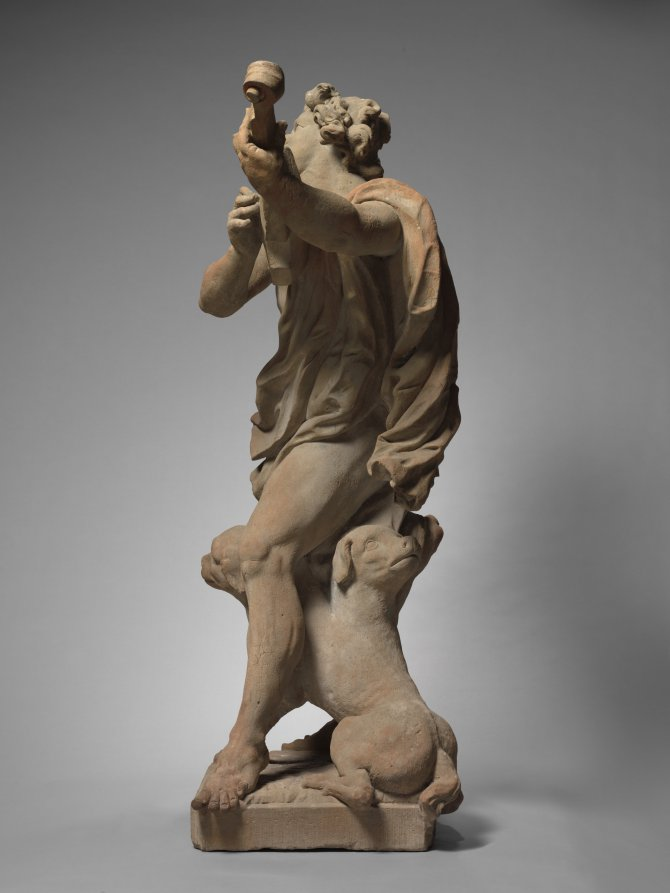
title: Orpheus and Cerberus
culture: Germany, near Bamberg, 18th century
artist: Ferdinand Tietz (Austrian, 1708–1777)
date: c. 1765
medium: sandstone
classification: Sculpture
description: This work was one of numerous sculptures Tietz created for the gardens of Schloss Seehof, near Bamberg in Bavaria (Germany), the summer residence of the Prince Bishops of Bamberg. The exaggerated forms of Orpheus's face and musculature caricature the idealized proportions of classical sculpture. A further parody exists with his companion: the usually terrifying hound Cerberus is here nothing more than a docile puppy, sitting calmly at Orpheus's feet. Meant to be viewed outdoors, on a high pedestal and from a distance, this work is less finely detailed than sculptures Tietz made for indoor settings at Seehof.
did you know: Taught to play the lyre by the Greek god Apollo, Orpheus's legendary musical abilities had the power to charm animals.